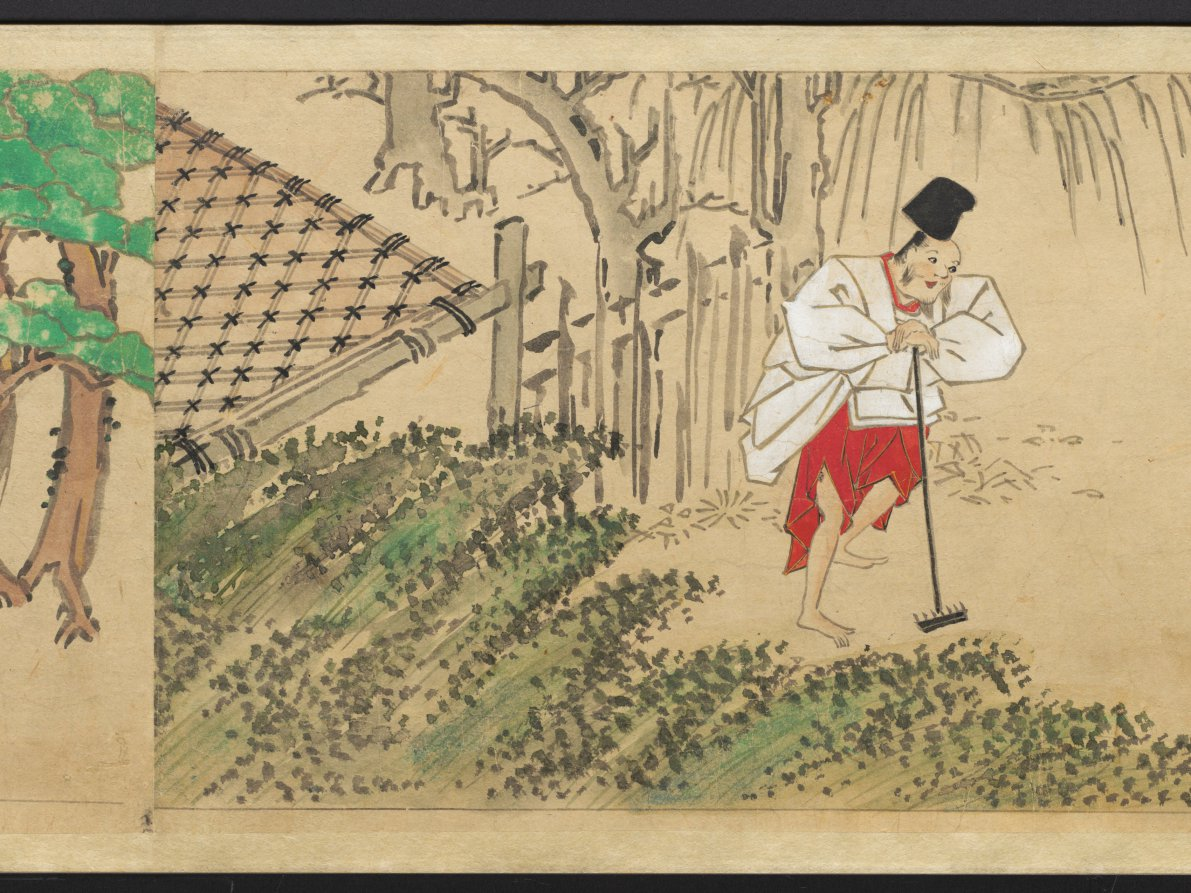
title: The Saltmaker's Story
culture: Japan, Edo period (1615–1868)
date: early 1600s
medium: One of a pair of handscrolls; ink, color, and gold on paper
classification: Painting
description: Once read and copied by girls at New Year’s celebrations and included in dowries, The Saltmaker’s Story is a rags-to-riches tale in which daughters are gifts from the gods. Despite his simple outlook, the main character progresses from humble roots as an associate at Kashima Shrine to the elite status of grandfather of the emperor through the intervention of the Kashima deity. The Saltmaker’s Story is traditionally presented in a set of three scrolls, but the text of this set has been removed by a previous owner, who remounted the illustrations as a pair. The paintings of this one take us from right to left through the first half of the tale.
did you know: This handscroll originally had texts before its paintings, but the texts were removed.